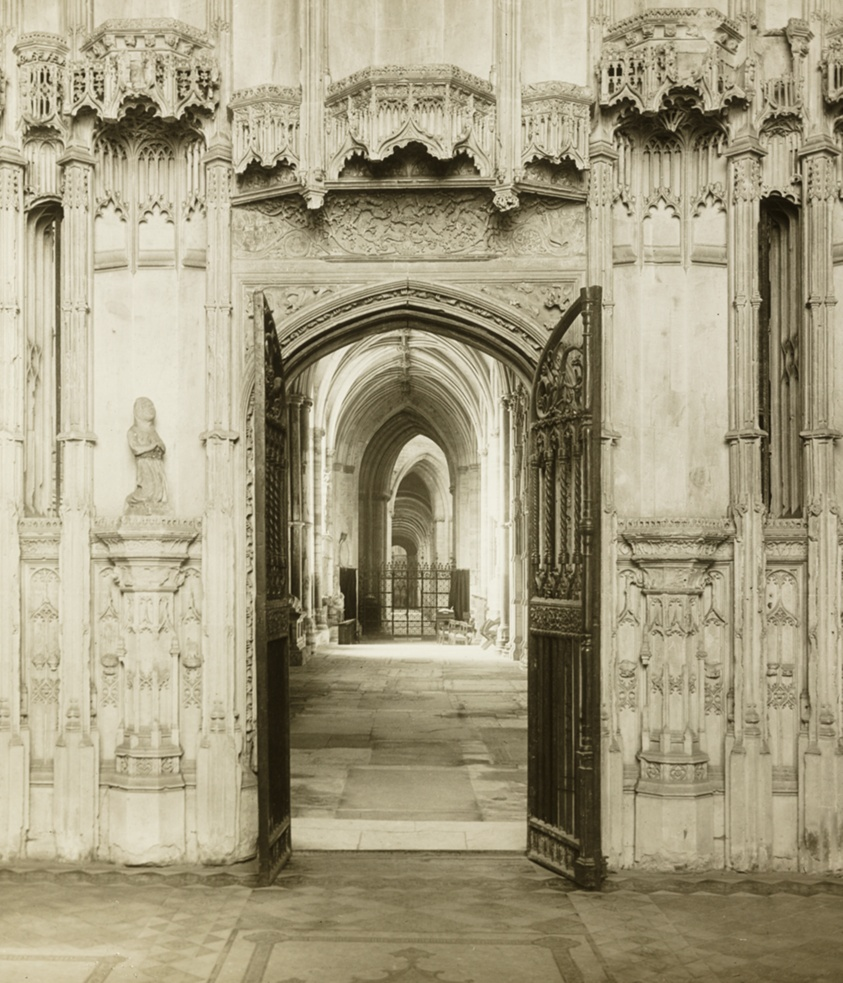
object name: Photograph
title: Ely Cathedral: From Br. West's Chapel into South Choir Aisle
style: Pictorialism, 19th century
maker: Frederick H. Evans (English, 1853–1943)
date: c. 1891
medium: Lantern slide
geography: England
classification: photograph; photography